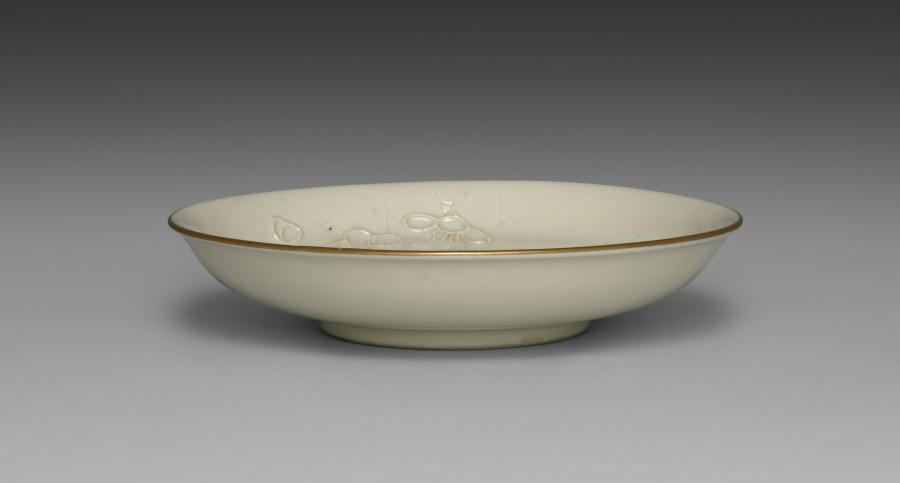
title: Medium-sized Dish from Dining Set with Plum Blossoms and Cracked-Ice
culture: Japan, Meiji period (1868–1912)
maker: Seifū Yohei II (Japanese, 1844–1878)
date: c. 1875–78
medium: Porcelain with molded designs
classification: Ceramic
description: Each item in this set has a delicate low-relief design of flowering plum branches over scattered, intersecting lines meant to resemble the cracked-ice surface of a frozen body of water and is signed on the base in gold pigment. While Yohei II produced many fine works in underglaze blue, like those produced by Kiyomizu Shichibei, he also made works in quite different styles later in his career, from the early 1870 s. In 1873, he was appointed purveyor to the Industrial Center of Kyoto Prefecture, a designation associated with Kyoto’s efforts to reach an international market through the port of Kobe; and from 1875 until his death, he was involved in national-level projects to present Japanese ceramics across the world. It was during this period that Yohei III was apprenticed to Yohei II, and it has been suggested that this set may in fact be an early example of Yohei III’s work, which he signed with his teacher’s name. Decorated with flowers resembling Japanese textile motifs, the set calls to mind the design of Yohei II’s pair of vases with plum blossoms in the Victoria and Albert Museum. Here, the elaborate trees created for a formal public exhibition setting have been translated into the approachable blossoms of the genteel domestic environment. While the designs are consistent across the pieces, each raised flower petal and pistil and each incised line in the ice was done by hand, so the cups, bowls, and dishes are similar yet unique. The bottoms of two boxes once identified the set’s owner, but the information has been deliberately obscured with black ink. However, inscriptions still visible appear to indicate two occasions, once at the end of July 1886 , and once again in June 1916 , when parts of the set were requested from Hokura in Niigata Prefecture. The location corresponds to a neighborhood in the present-day city of Jōetsu. The surname Tsuji 辻 also appears on a paper tag affixed to one of the box cloths. Future research may possibly reveal more about their provenance. A vase by Yohei III in a private collection combines the formal grandeur of the Yohei II vases in the Victoria and Albert Museum with the gentler design of this dining set, placing flowering plum trees against soft, scalloped-edge clouds resembling those in golden screens.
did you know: The dining wares have a creamy white coloration that the four boxes containing them identify as Korean in style.